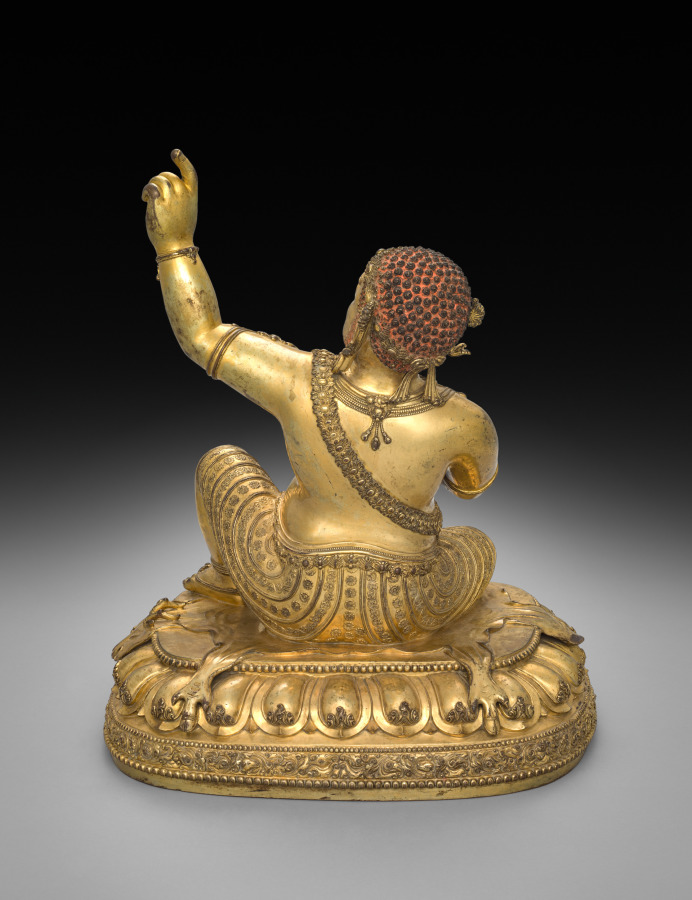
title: Virupa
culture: China, Ming dynasty (1368-1644), Yongle reign (1403-1424)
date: early 1400s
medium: Gilt bronze with silver, stones, and pigment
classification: Sculpture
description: Virupa is one of the great teachers in the history of tantric Buddhism. His posture references his ability to stop the sun; as an enlightened being, he can control phenomena of nature. As a tantric practitioner, he overturns ordinary assumptions about proper behavior, so he overeats, drinks large quantities of liquor, and waits for the king to pay his bill at the tavern. At the edge of the lotus pedestal is an inscription identifying the image as having been made in the imperial kilns of the third emperor of the Ming dynasty in China as a gift to a Tibetan monastic leader. While closely linked to Tibetan styles, the luxurious detailing, special gilding process, and the casting of the ornaments onto the body without use of inlay are specifically Chinese characteristics.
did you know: Virupa's clothing and jewelry are embellished with silver and stones, while pigments enhance his hair and eyes.